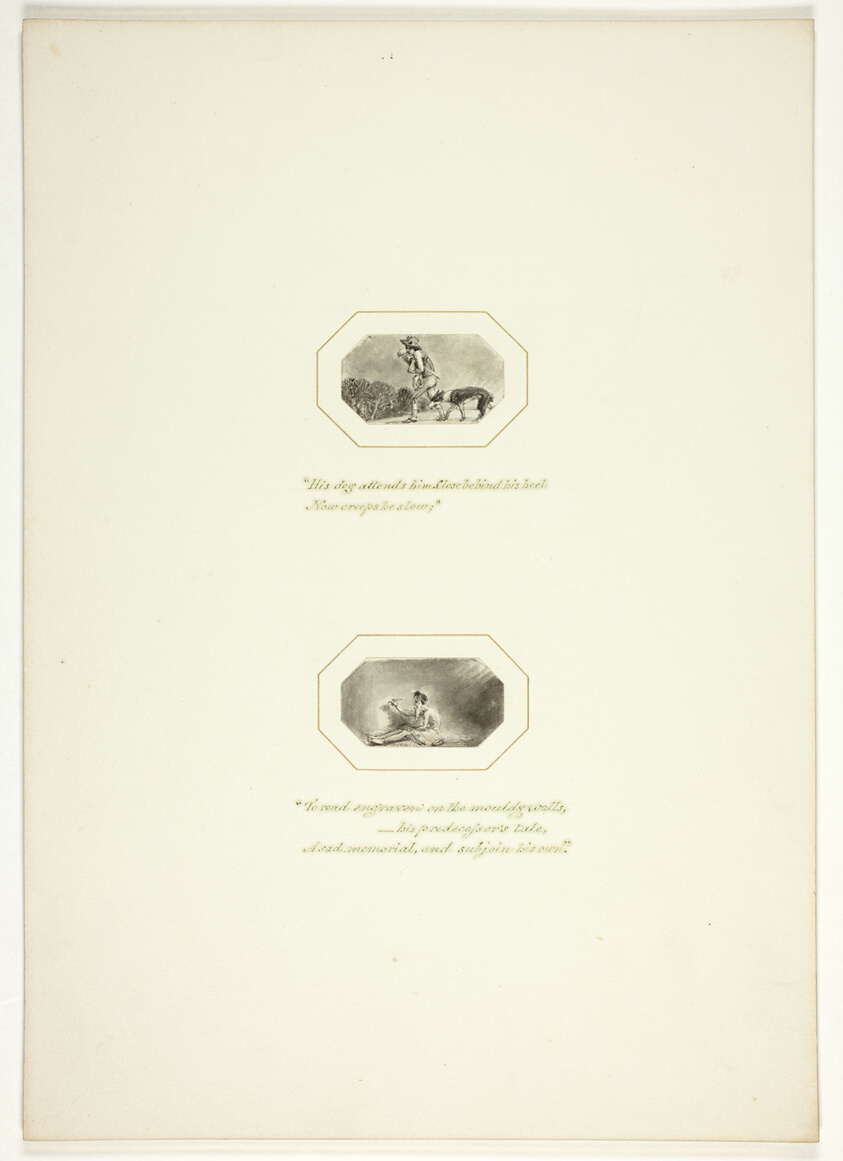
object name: Drawing and Watercolor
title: Study for a plate from The Task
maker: Thomas Stothard (English, 1755-1834)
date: c. 1800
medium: Ink wash on paper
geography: England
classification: ink or chalk wash; drawings (visual works); prints and drawing